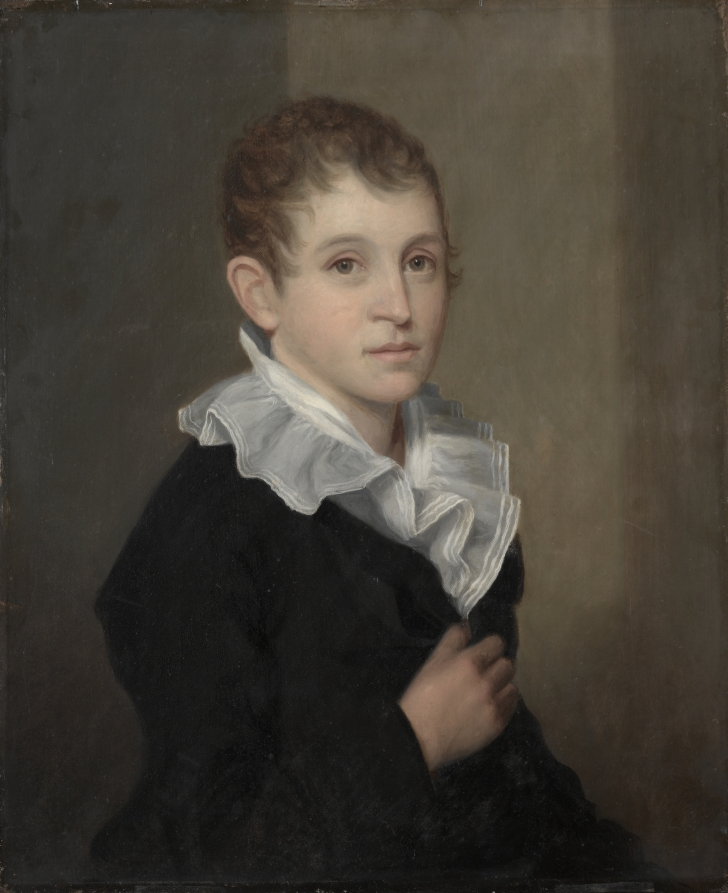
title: Samuel Barber Clark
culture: America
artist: James Frothingham (American, 1786–1864)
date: c. 1810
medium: oil on wood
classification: Painting